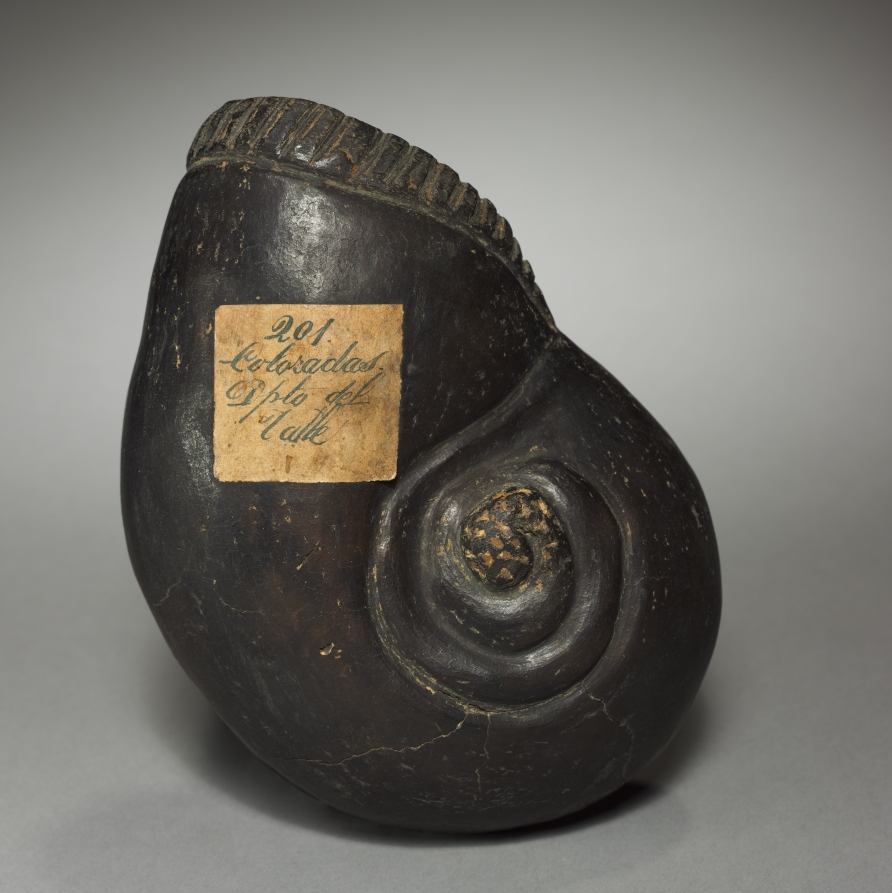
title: Large Snail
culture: Colombia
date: before 1921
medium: pottery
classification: Ceramic